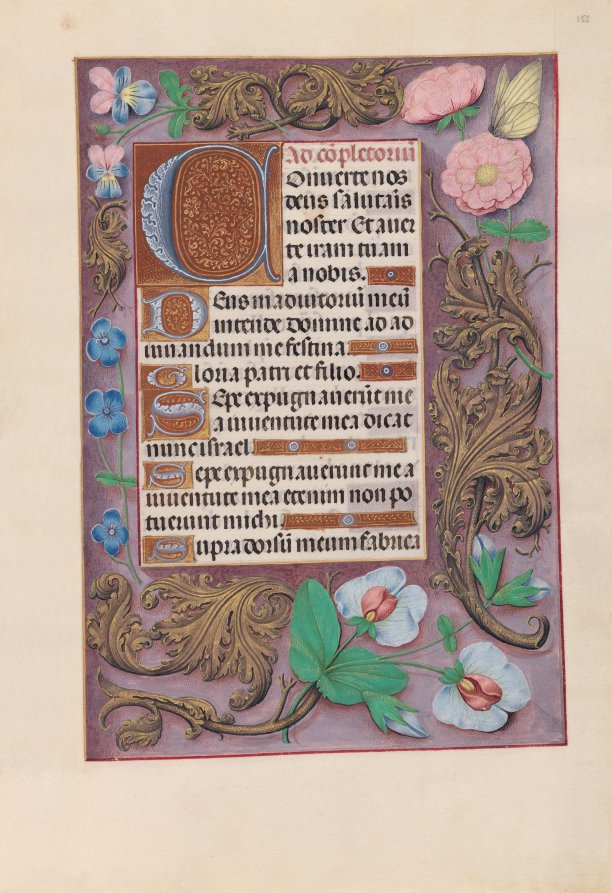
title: Hours of Queen Isabella the Catholic, Queen of Spain: Fol. 155r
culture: Flanders, Ghent and Bruges, late 15th century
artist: Master of the First Prayerbook of Maximillian (Flemish, c. 1444–1519)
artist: and Associates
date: c. 1500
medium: ink, tempera, and gold on vellum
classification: Bound Volume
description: This manuscript was illuminated by a circle of at least five highly organized manuscript painters active in the Flemish cities of Ghent and Bruges. The principal illuminator was Alexander Bening, who painted the majority of the book's miniatures. Manuscripts produced by this circle of artists are renowned for the decoration of their borders, which typically feature a rich variety of realistically-painted flowers, birds, and butterflies. This prayer book, called a book of hours, was intended not for a cleric, but for the private devotions of a lay person-in this case, Isabella the Catholic, Queen of Spain (1451-1504). Isabella's coat of arms embellishes the book's frontispiece. It is unlikely that the book was commissioned by the Queen herself; rather, she probably received it as a diplomatic gift from someone courting her patronage, perhaps Cardinal Francisco Jimenez de Cisneros. A Franciscan friar, Jimenez was dependent upon Isabella for his advancement, first to the post of Queen's confessor in 1492, and then to Archbishop of Toledo in 1495.